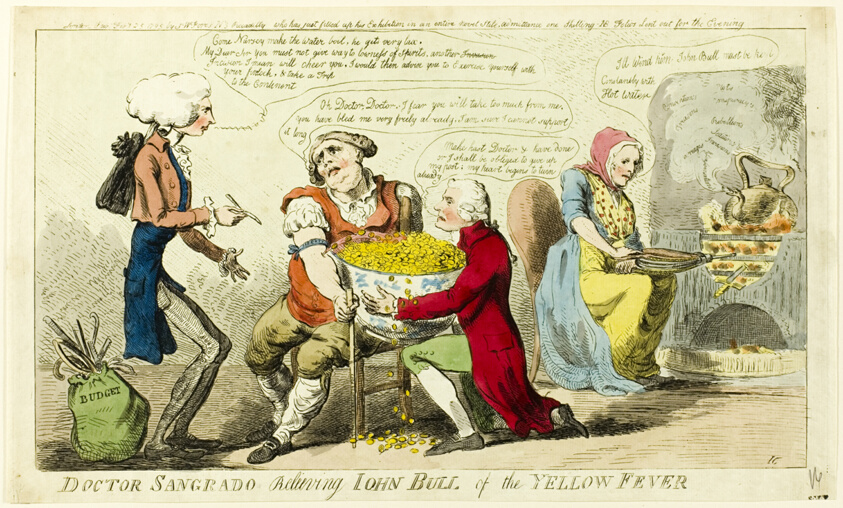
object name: Print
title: Dr. Sangrado Relieving John Bull of Yellow Fever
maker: Isaac Cruikshank (English, 1764-1811); published by S.W. Fores (English, 1761-1838)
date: published February 25, 1795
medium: Hand-colored etching on paper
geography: England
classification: etching; print; prints and drawing